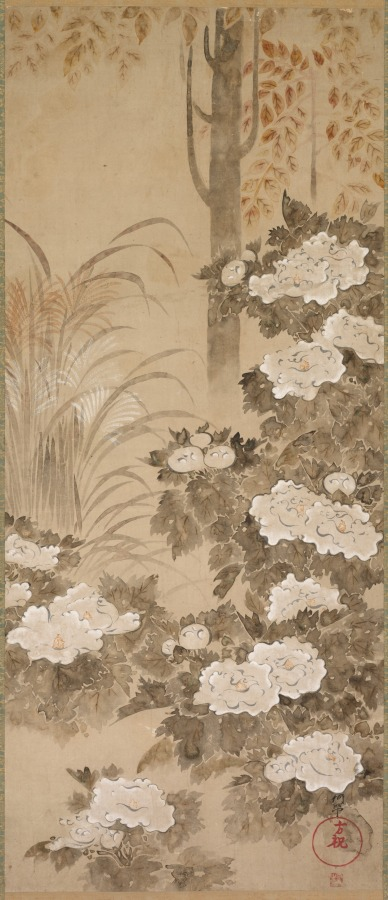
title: Peonies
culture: Japan, Edo period (1615–1868)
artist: Tatebayashi Kagei (Japanese, active mid-1700s)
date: mid 1700s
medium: hanging scroll; ink and color on paper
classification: Painting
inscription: lower right, Kagei's signature in black, a round red seal and a small square one.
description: A proliferation of white tree peonies dominates this composition. Behind them are tall, feathery-topped susuki grasses and leafy deciduous trees. Tatebayashi Kagei restricted his palette to ink with red and white color, along with sparing use of green in the peony leaves and the blades of grass. He made generous use of the “dripping-in” (tarashikomi) technique, layering pooled ink and color, in the peony leaves. The areas left in reserve create the impression of insect-eaten or late season foliage.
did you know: In 1738, Kagei received a copy made by Ogata Kōrin of a fan painting by Tawaraya Sōtatsu from Kōrin's brother Ogata Kenzan, so some think he trained with Kenzan in Edo (present-day Tokyo).